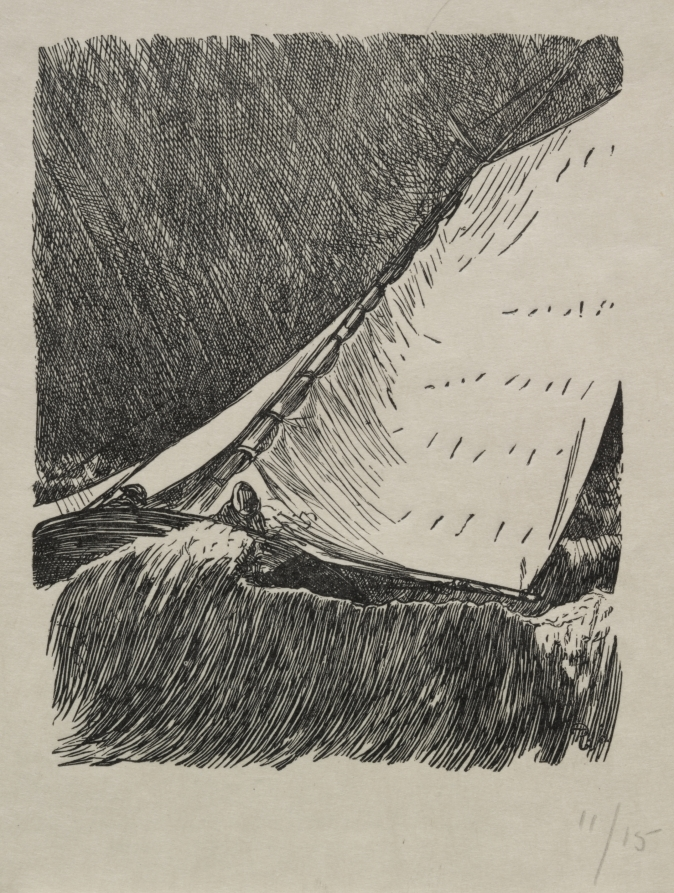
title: Second Thoughts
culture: England, 19th century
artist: George Louis Palmella Busson Du Maurier (British, 1834–1896)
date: 1866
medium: wood engraving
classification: Print